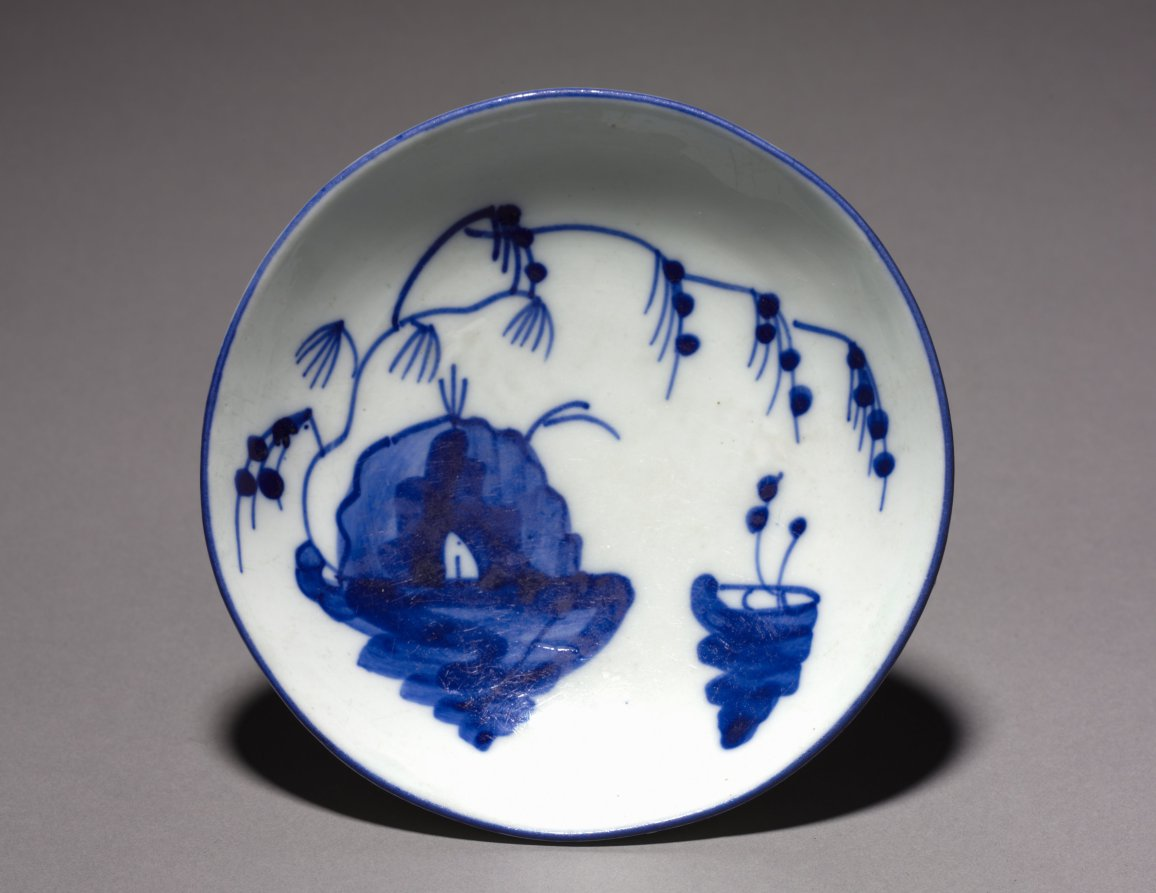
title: Saucer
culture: France, Chantilly, late 18th-early 19th century(?)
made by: Chantilly Porcelain Factory (French)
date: 1800s ?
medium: porcelain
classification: Ceramic